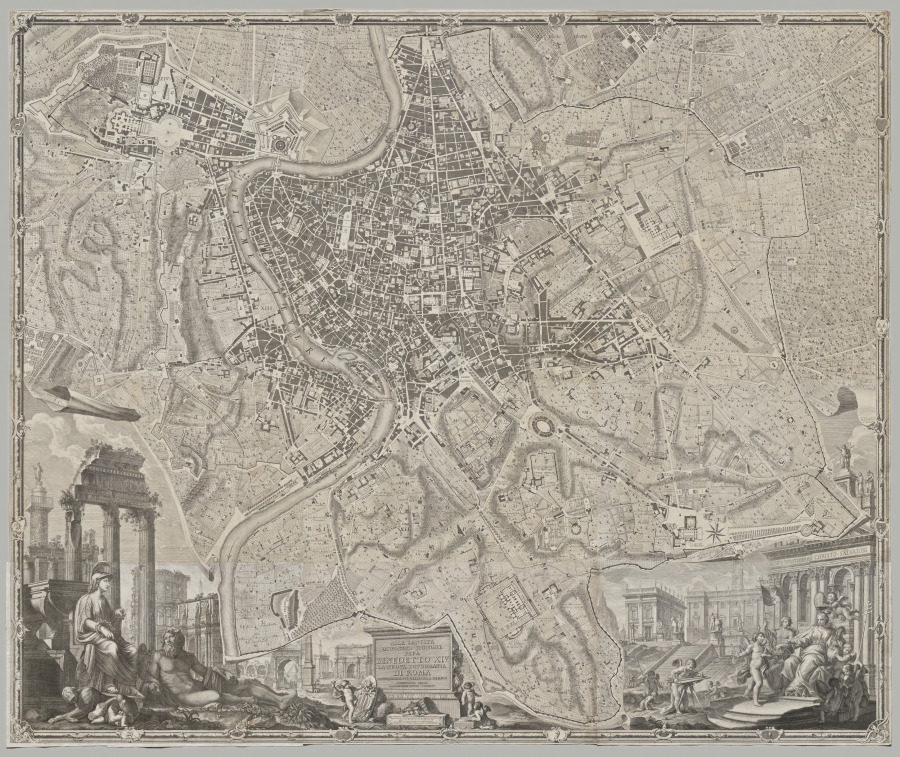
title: Nuova pianta di Roma data in luce da Giambattista Nolli l’anno MDCCXLVII, known as La Pianta Grande di Roma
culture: Italy, 18th century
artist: Giovanni Battista Nolli (Italian, 1701–1756)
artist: Carlo Nolli (Italian, 1690–1790)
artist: Rocco Pozzi (Italian, 1701–1774)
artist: Pietro Campana de Soriano (Italian, 1725–c. 1779)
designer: Stefano Pozzi (Italian, 1699–1768)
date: 1748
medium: 12 sheets with 4 index sheets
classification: Print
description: The monumental Pianta Grande di Roma, or Large Plan of Rome, which measures about 5 x 7 feet when its twelve plates are assembled, is a landmark in both cartography and printmaking. The map is considered the first scientific rendering of Rome, establishing new standards of accuracy and thoroughness when it was published in 1748. Devised by the Lombard architect and surveyor Giovanni Battista Nolli (Italian, 1701-56), the creation of the map required over ten years of surveying the city carried out by Nolli and a team of assistants with the help of new measuring devices. In Nolli’s “ichnographic” (also called “ground”) plan, architectural features and the urban infrastructure are reduced to a single horizontal slice, a minutely detailed footprint that conveys dimensions, proportions, and orientations to scale with the utmost clarity.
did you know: To make this map, Pope Clement XII granted the mapmaker permission to measure courtyards and other interior, inaccessible spaces in monastic communities, even those in nuns’ convents, which was controversial at the time.